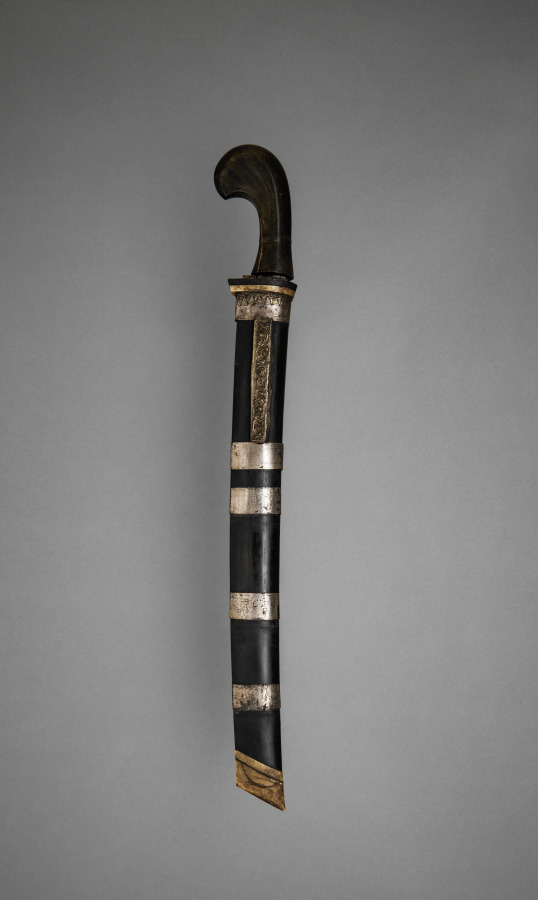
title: Dagger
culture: Indonesia, Sulawesi (Celebes)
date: before 1916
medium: metal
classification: Arms and Armor